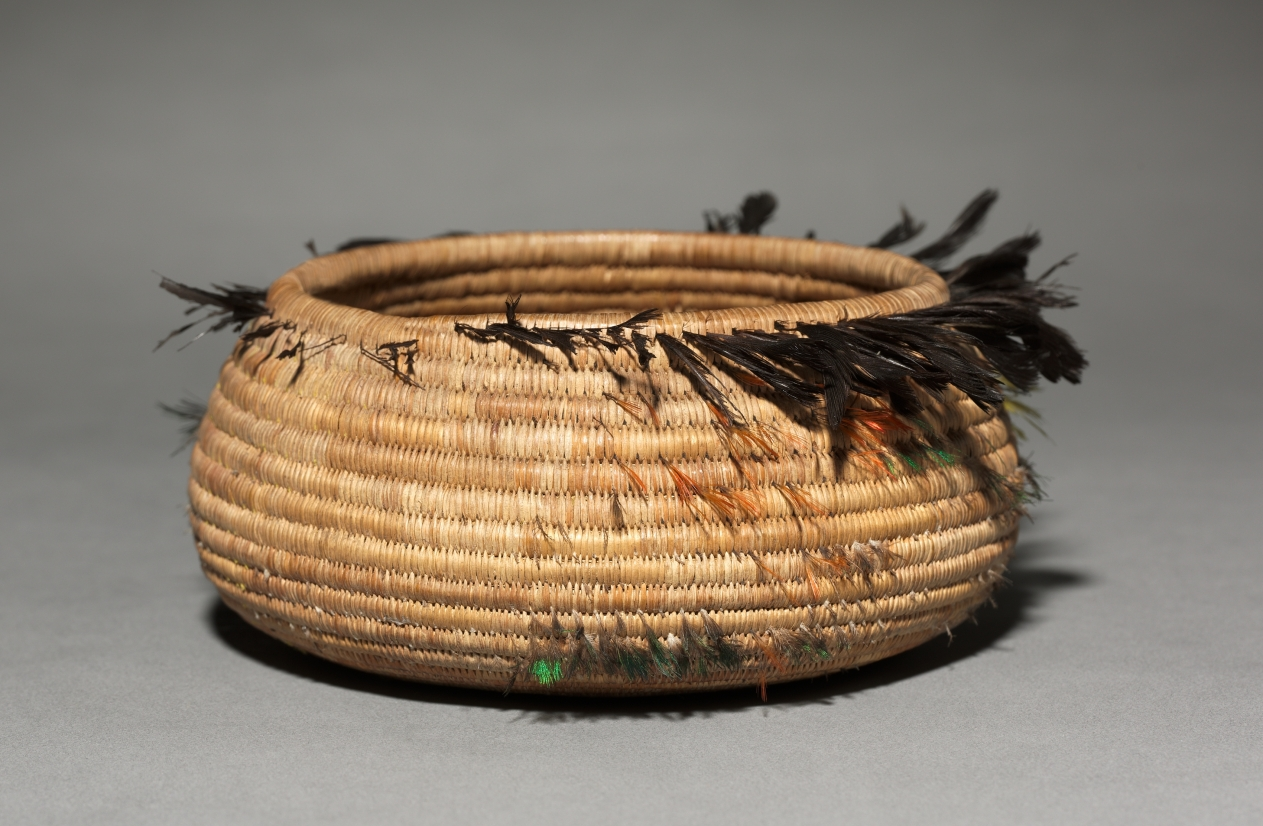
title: Gift Bowl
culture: California, Pomo, Eastern, Late 19th- Early 20th century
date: 1900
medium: Sedgw with Feathers; Coiled (3 rods)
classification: Basketry